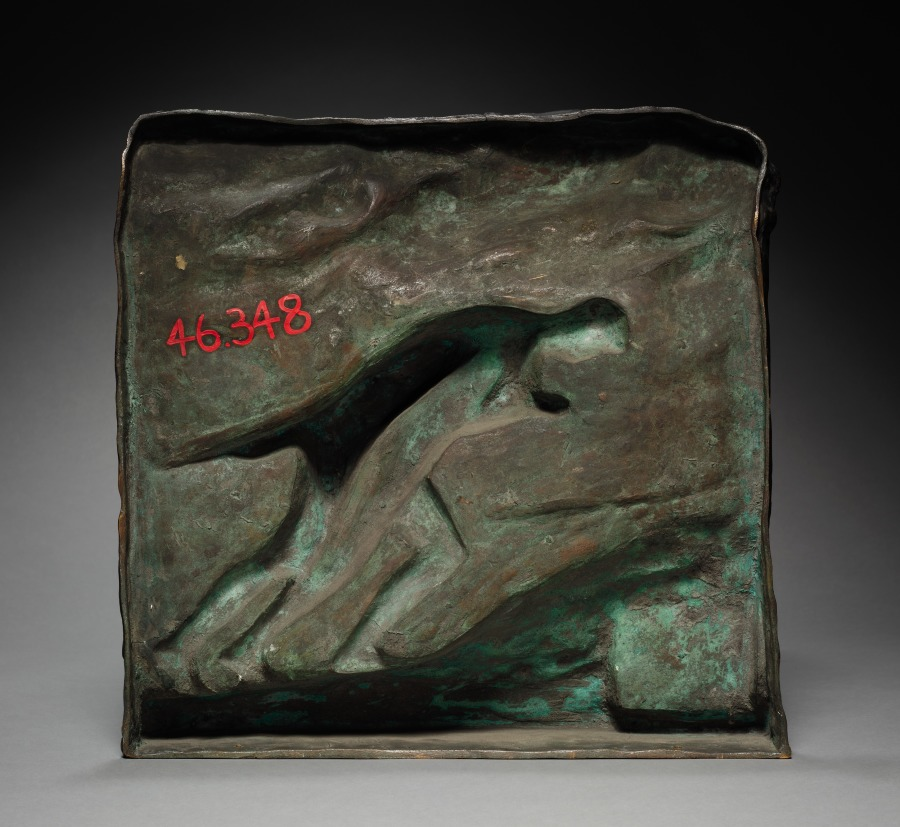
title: The Soil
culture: Belgium, 19th century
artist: Constantin Meunier (Belgian, 1831–1905)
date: c. 1890 – 1900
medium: bronze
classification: Sculpture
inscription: Signed right: "C. Meunier"; inscribed lower right front: "B. Verbeyot, Fondeur, Bruxelles."; lower left: "GLEBE"